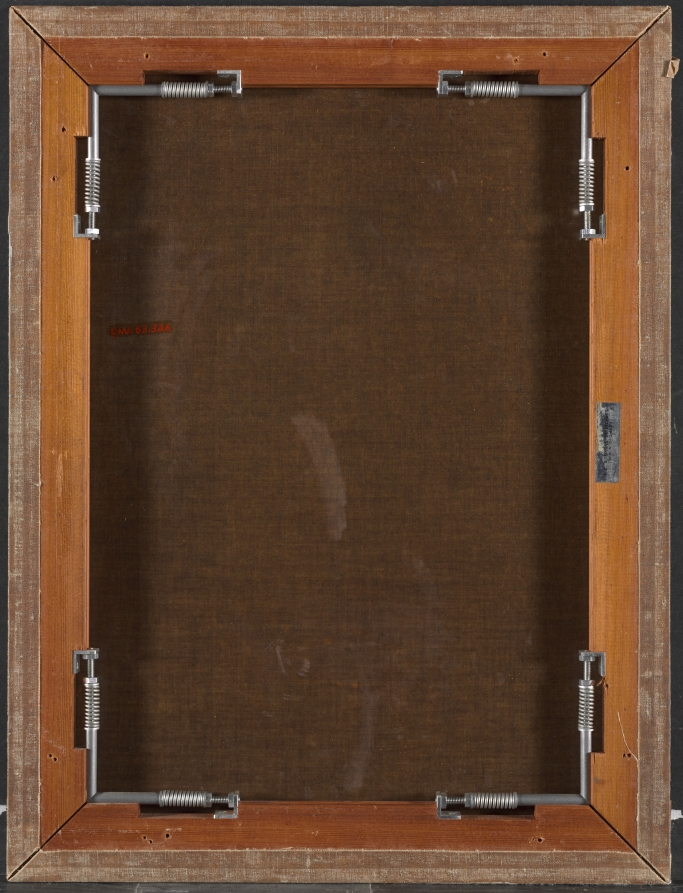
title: Study for "The Presentation of Christ in the Temple" (for Saint Ulrich, Vienna)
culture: Austria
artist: attributed to Franz Anton Maulbertsch (Austrian, 1724–1796)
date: c. 1750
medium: oil on canvas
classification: Painting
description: This loosely painted sketch is the preliminary design for an altarpiece in the Church of Saint Ulrich, Vienna. Mary and Joseph have brought the infant Jesus to the temple to be inducted into the Jewish faith; the aged priest Simeon cradles the infant in his arms, turning his gaze to heaven as he realizes that he is holding the Son of God. Strong contrasts of light and shadow underscore the drama of the moment. The frame is not original to this painting, but was made by an Austrian craftsman in the mid-1700s. Its florid style suits Maulbertsch’s flickering brushwork, and reflects the tradition of wood sculpture from Central Europe seen in other objects in the CMA's collection.